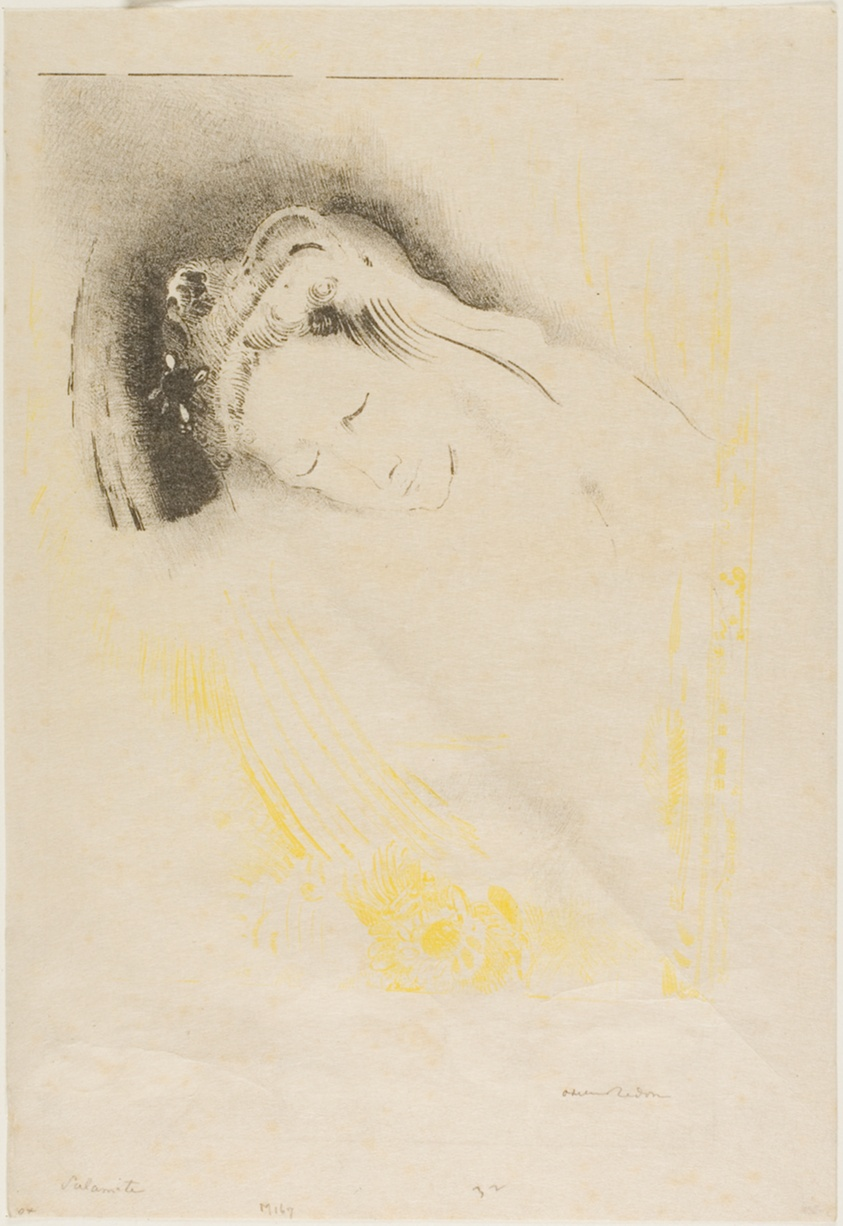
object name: Print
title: The Shulamite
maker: Odilon Redon (French, 1840-1916)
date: 1897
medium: Lithograph printed in black and yellow on buff Japanese paper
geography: France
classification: lithograph; print; prints and drawing; paper